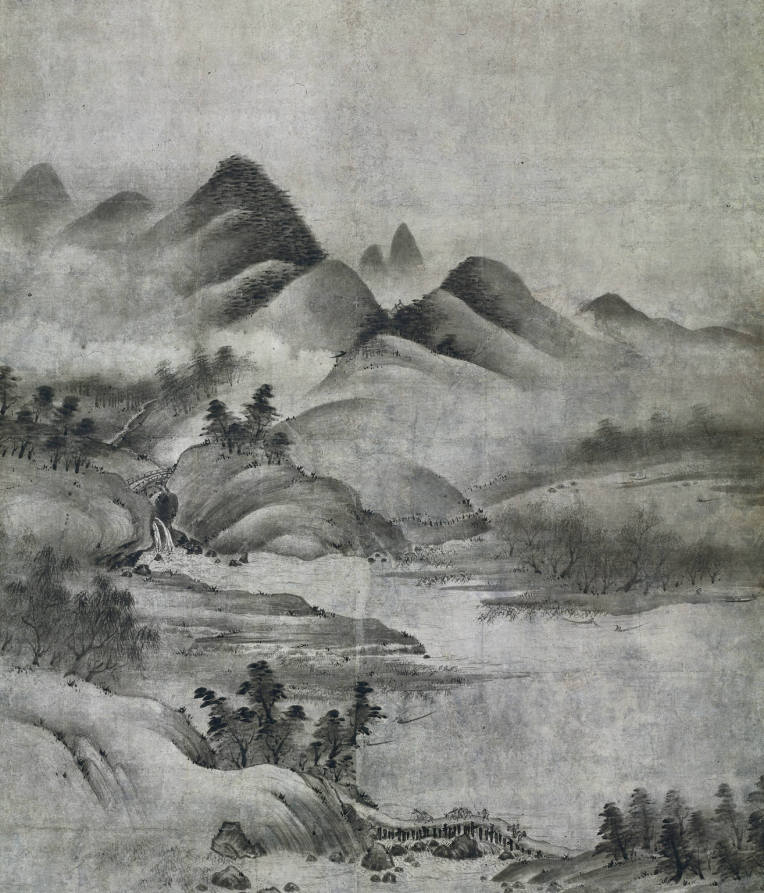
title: Landscape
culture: Japan, Muromachi period (1392–1573)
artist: Sōami (Japanese, d. 1525)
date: early 1500s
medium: hanging scroll; ink on paper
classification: Painting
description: Kyoto-based painter Sōami adapted the small-format Chinese album leaf and handscroll painting compositions belonging to the Ashikaga shogunate to the large-scale paintings he created for residences and Buddhist temples. As curator of the shogunal collection, Sōami would have carefully examined its Southern Song and Yuan dynasty Chinese paintings, gaining specialized knowledge of a variety of brush modes, including the soft style used for this painting. The scene is part of a continuous landscape once mounted in the folding screen format. Removed from the screen, this section of the painting was cut down, given new backing papers and a textile mounting with a hanging cord at the top and a roller with knobs at the bottom so that it could continue to be appreciated.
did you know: Another part of this composition survives in Kyushu, Japan.